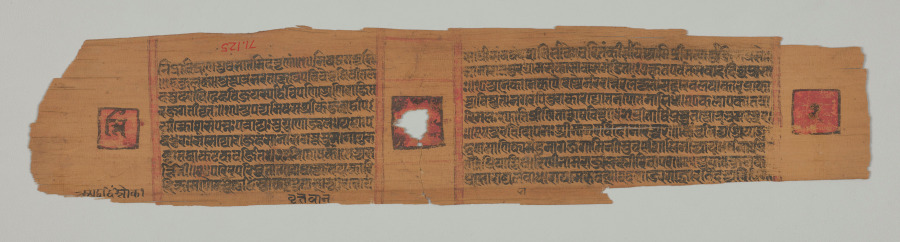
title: Text, folio 2 (verso) from a Parshvanatha Charitra (Life and Stories of Lord Parshva) of Bhavadeva-suri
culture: Western India, Gujarat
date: c. 1275–1300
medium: Gum tempera and ink on palm leaf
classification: Painting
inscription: [[verso, top line]] Nibaddham astabhih sargaih sambaddham daśabhir bhāvaiś caritam kīrtayiṣyāmi śrīmadpārśvajinarabhoḥ...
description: The nine lines of text on this page are written in Devanagari script. They are read from left to right, with each line of text spanning the entire length of the page. It introduces the story of the pious Marubhuti who, after passing through nine more lives, will be reborn as Parshva and reach liberation. The notation in the red squares of the margins indicate the folio number using two different systems. Corrections to the text copy made by later readers are jotted in the lower margin.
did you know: South Asian manuscripts are usually numbered on the verso; the Devanagari numeral 2 at the right is similar to the Arabic number.